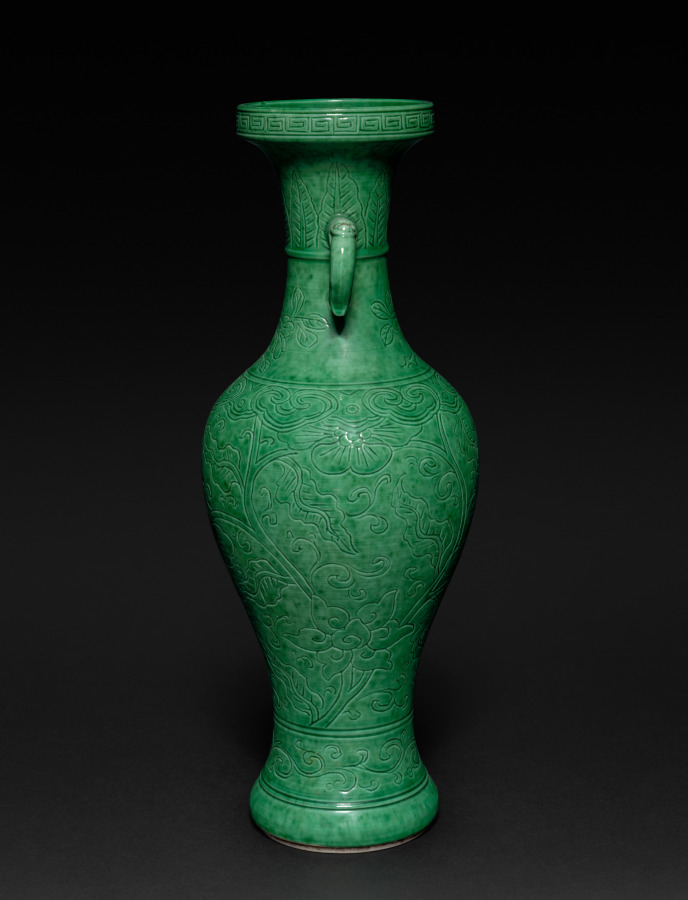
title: Vase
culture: China, Jiangxi province, Jingdezhen kilns, Qing dynasty (1644-1911), Kangxi reign (1662-1722)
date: 1662–1722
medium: glazed white porcelain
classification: Ceramic